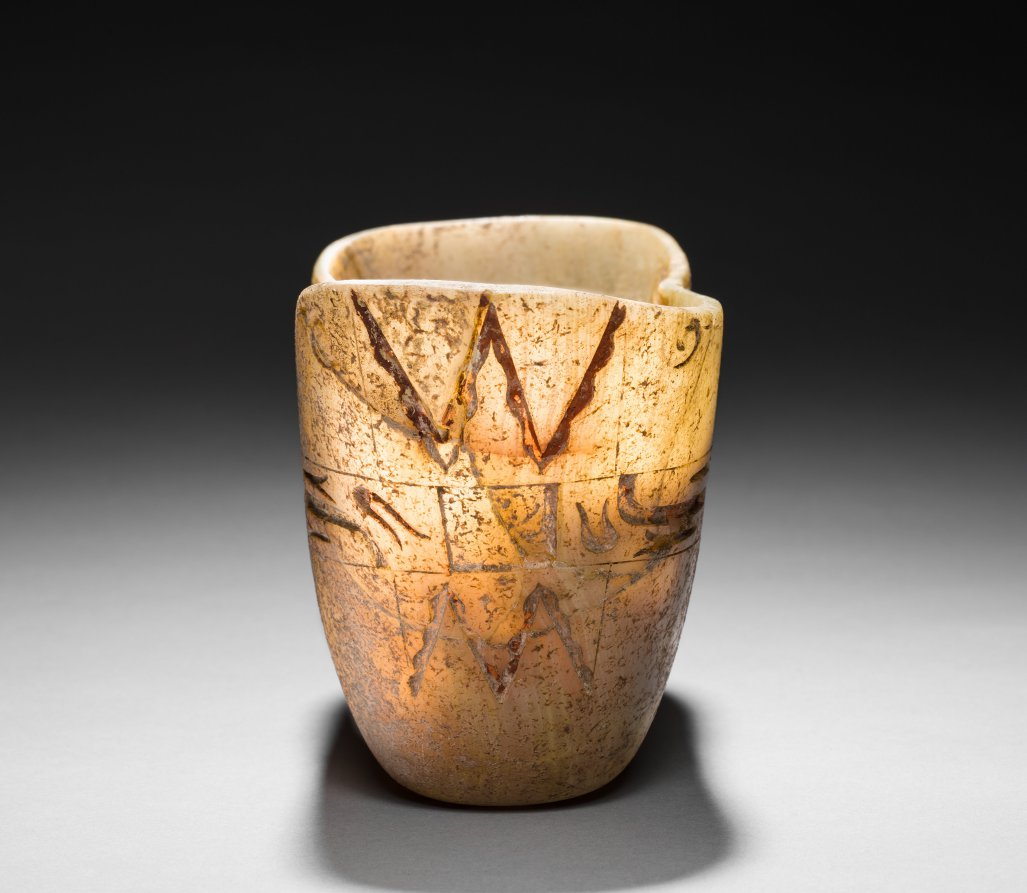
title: Carved Bowl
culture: Mesoamerica, reportedly the Tepecoacuilco River Valley, Guerrero, Olmec style (1200-300 BC), Formative Period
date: 1200–300 BCE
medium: stone (travertine)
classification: Stone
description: Containers made of translucent white travertine, known among the later Aztecs as tecali, are rare in Olmec artistic production. The shape of this elegant example, its rim pinched inward at the center, may refer to a squash. The meaning of the deeply carved abstract motifs, which retain traces of red pigment, is unknown. The bowl is said to have been found in a burial cache that included an Olmec figurine, a hematite mirror, and jade ornaments in Guerrero, Mexico.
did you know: Travertine is a type of limestone deposit commonly found in caves and hot springs.